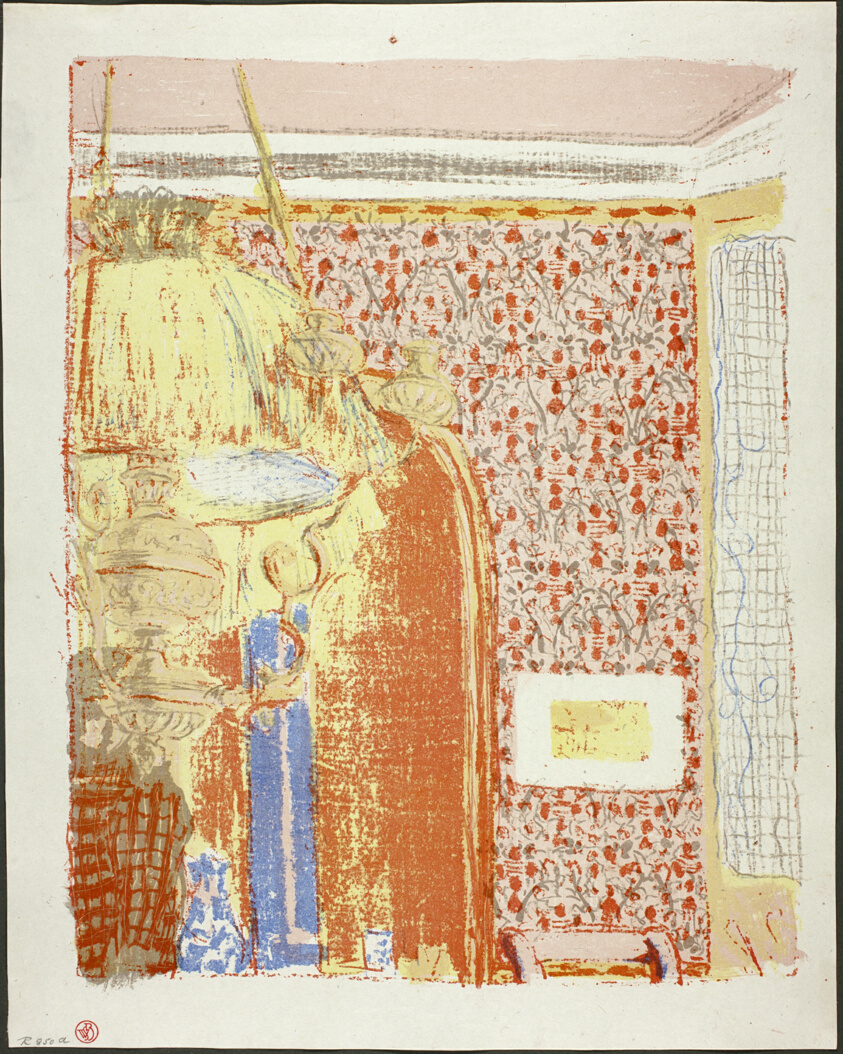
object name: Print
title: Interior with Pink Wallpaper II, plate six from Landscapes and Interiors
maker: Edouard Vuillard (French, 1868-1940); printed by Auguste Clot (French, 1858-1936); published by Ambroise Vollard (French, 1867-1939)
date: 1899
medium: Color lithograph on grayish-ivory China paper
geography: France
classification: lithograph; print; prints and drawing